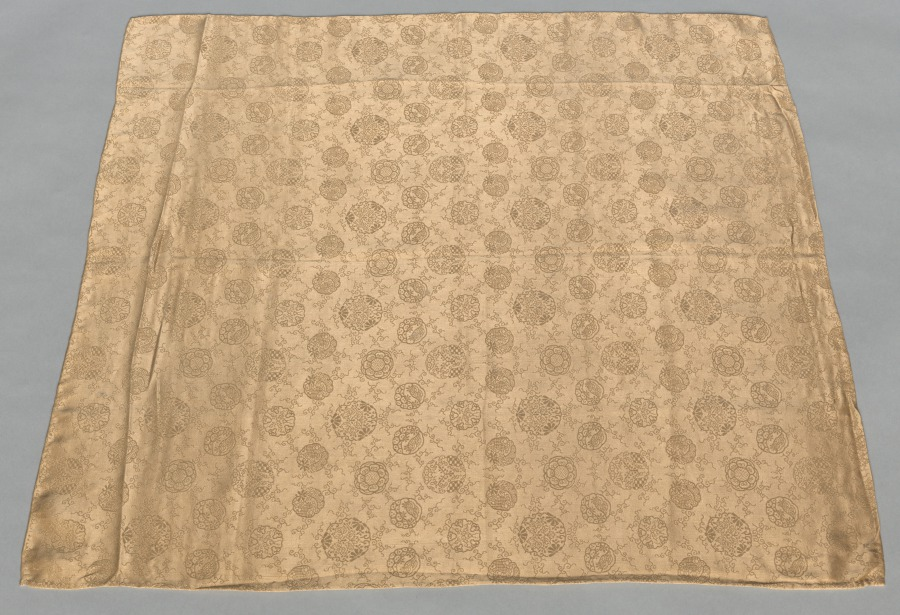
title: Fragment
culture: China, 19th century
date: 1800s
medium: silk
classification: Textile